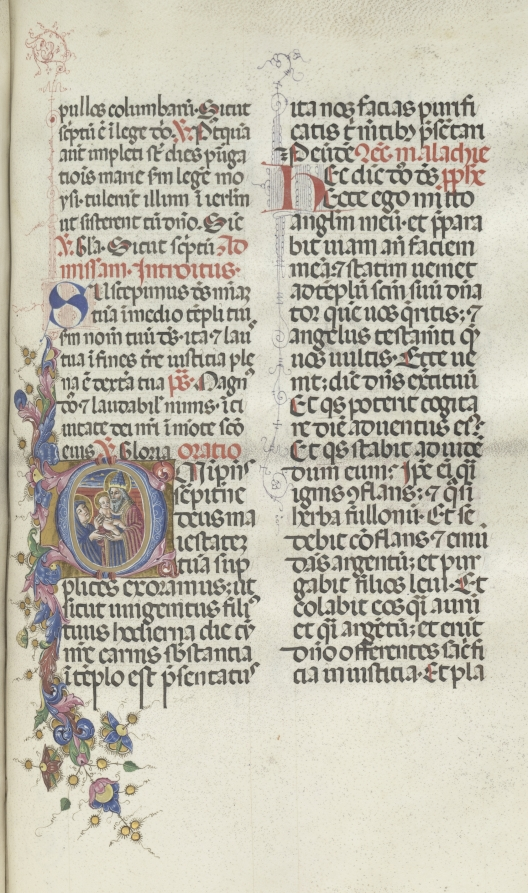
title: Missale: Fol. 270: Presentation of Christ to Simeon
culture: Italy, Perugia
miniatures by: Bartolommeo Caporali (Italian, c. 1420–1503)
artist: assisted by Giapeco Caporali (Italian, d. 1478)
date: 1469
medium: ink, tempera and burnished gold on vellum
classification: Bound Volume